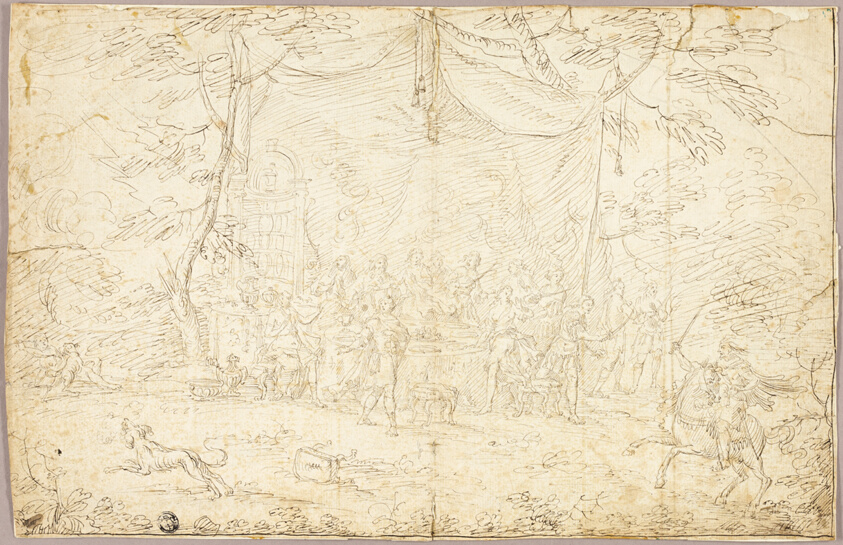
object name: Drawing and Watercolor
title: Literary Subject: Banquet Scene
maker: Jean Cotelle, the Younger (French, 1642-1708)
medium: Pen and brown ink on cream laid paper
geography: France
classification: pen and ink drawings; paper; drawings (visual works); prints and drawing